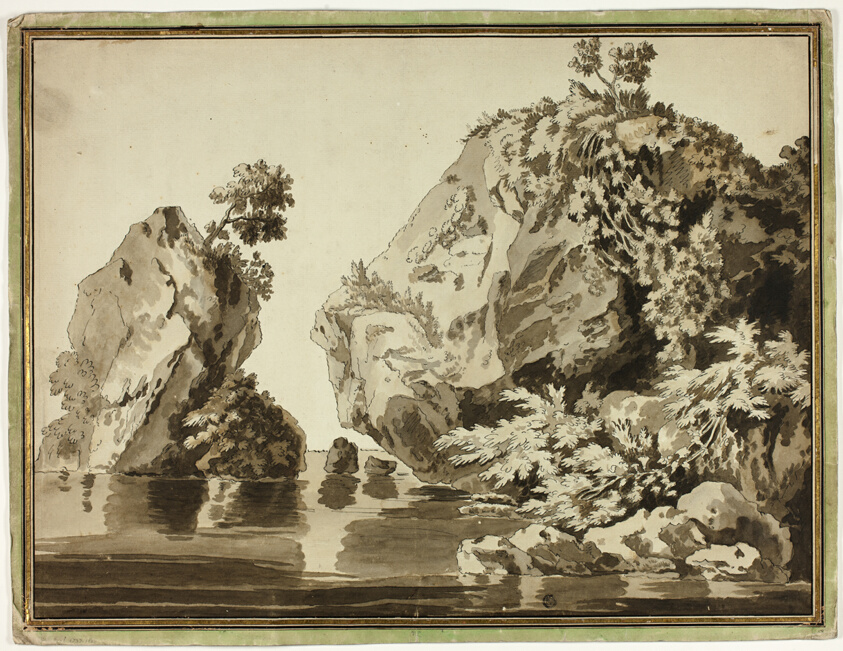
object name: Drawing and Watercolor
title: Rocks and Water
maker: Attributed to or after Jacob Philipp Hackert; German, 1737-1807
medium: Pen and black ink and brush and brown and gray wash on cream laid paper, laid down on board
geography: Germany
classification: pen and ink drawings; paper; brush and wash; drawings (visual works); prints and drawing